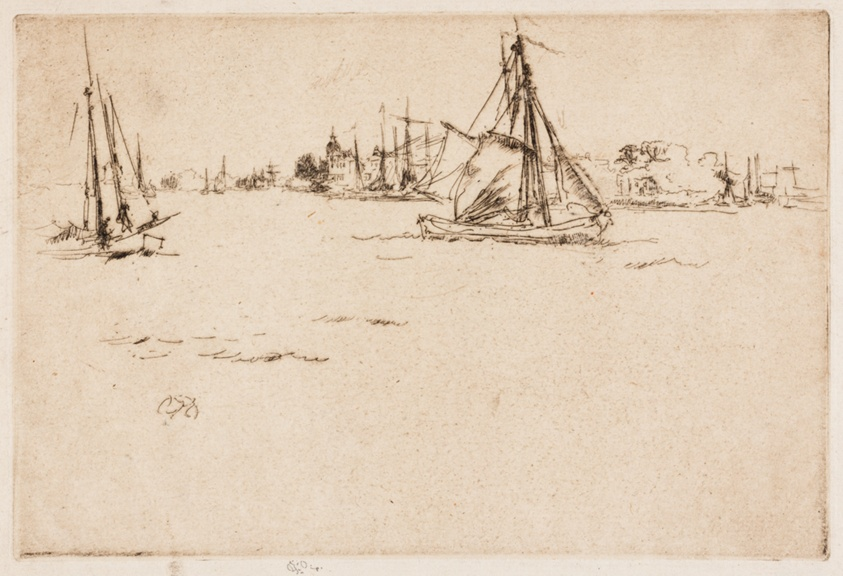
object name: Print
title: Dordrecht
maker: James McNeill Whistler (American, 1834-1903)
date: 1886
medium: Etching and drypoint with foul biting in dark brown ink on ivory laid paper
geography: United States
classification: etching; foul biting; print; prints and drawing; drypoint; paper